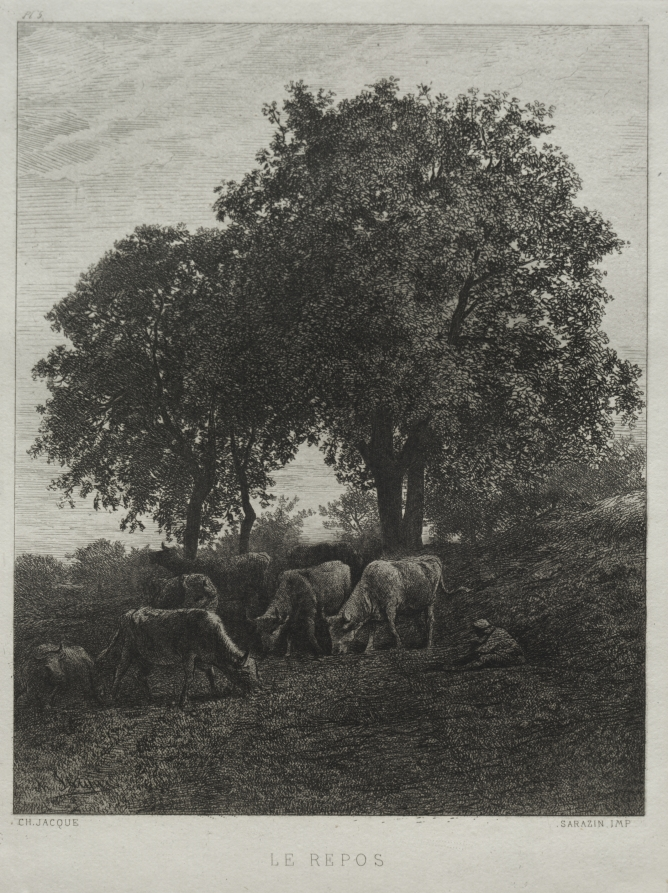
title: Rest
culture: France, 19th century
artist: Charles-Émile Jacque (French, 1813–1894)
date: 1864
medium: etching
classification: Print